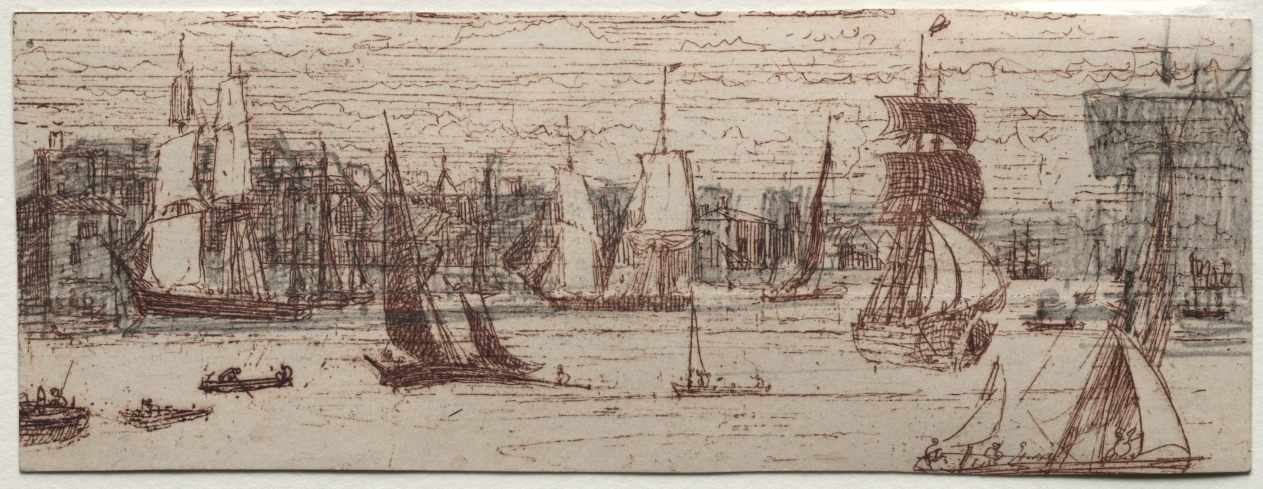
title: A Sketch Off Greenwich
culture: England, 19th century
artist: Francis Seymour Haden (British, 1818–1910)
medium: etching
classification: Print